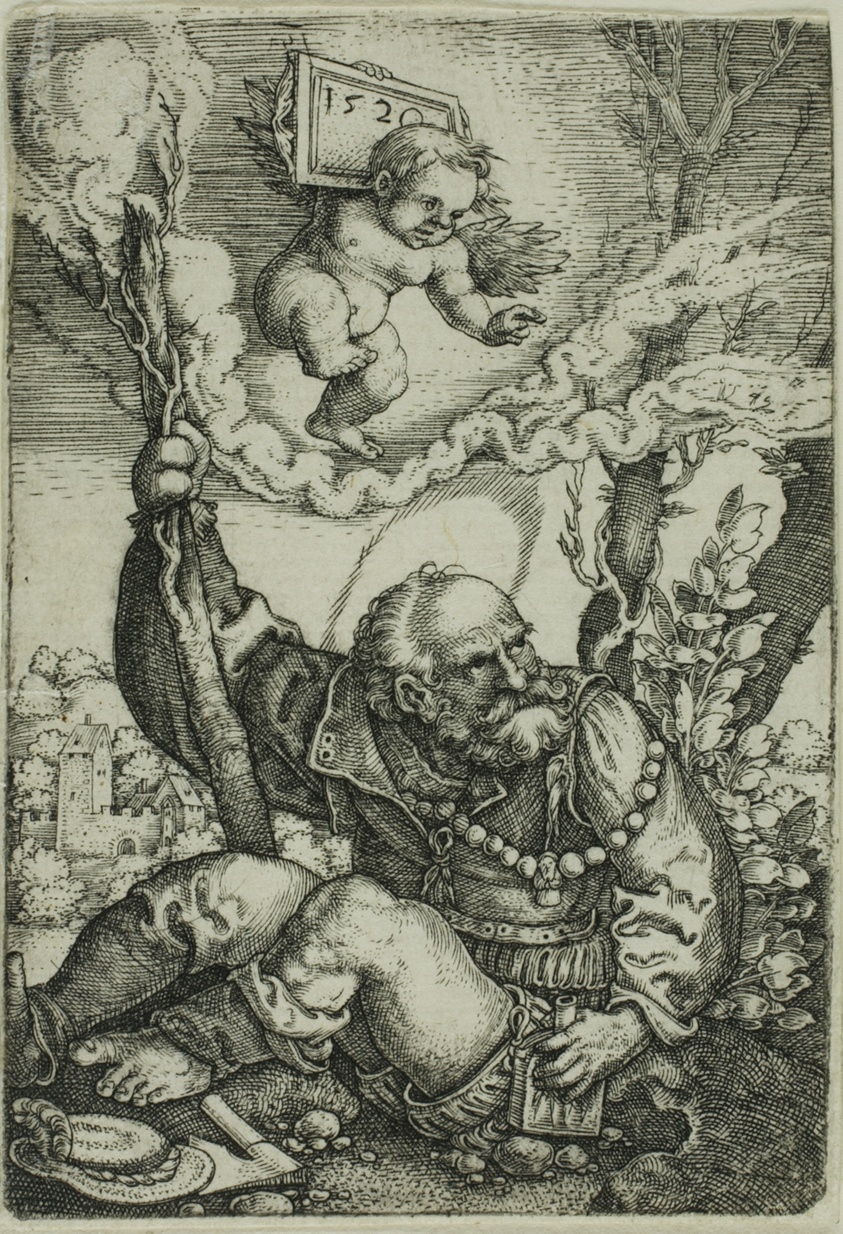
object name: Print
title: Saint Christopher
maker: Barthel Beham (German, 1502-1540)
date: 1520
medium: Engraving in black on ivory laid paper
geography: Germany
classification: engraving; print; prints and drawing